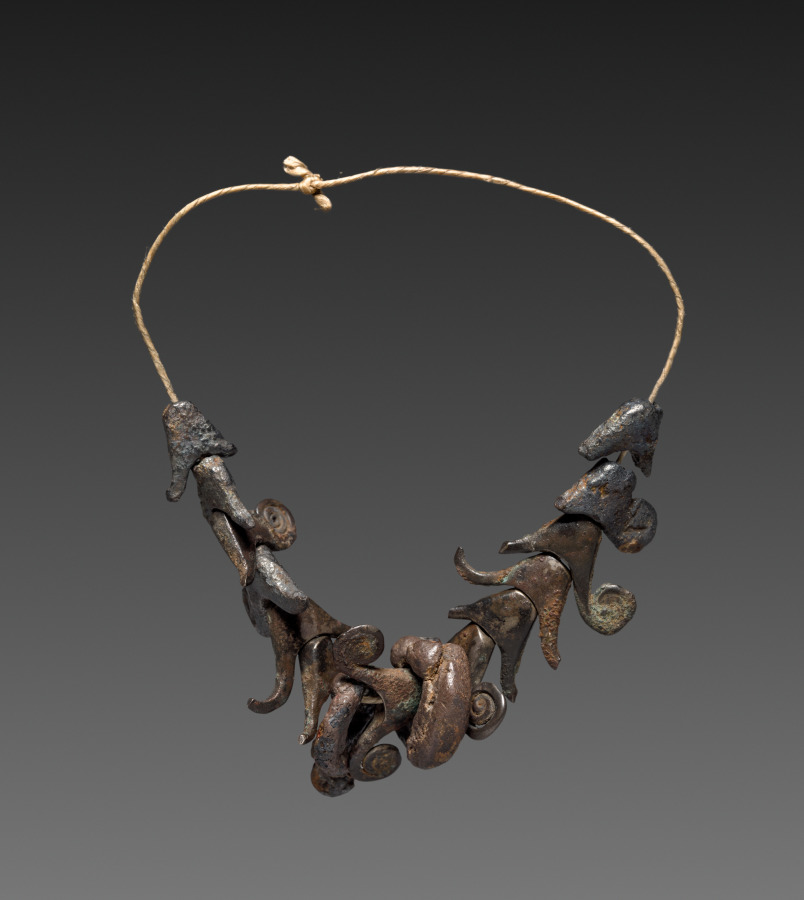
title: Silver Necklace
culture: Aegean, Minoan(?), Bronze Age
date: c. 1500 BCE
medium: silver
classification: Jewelry